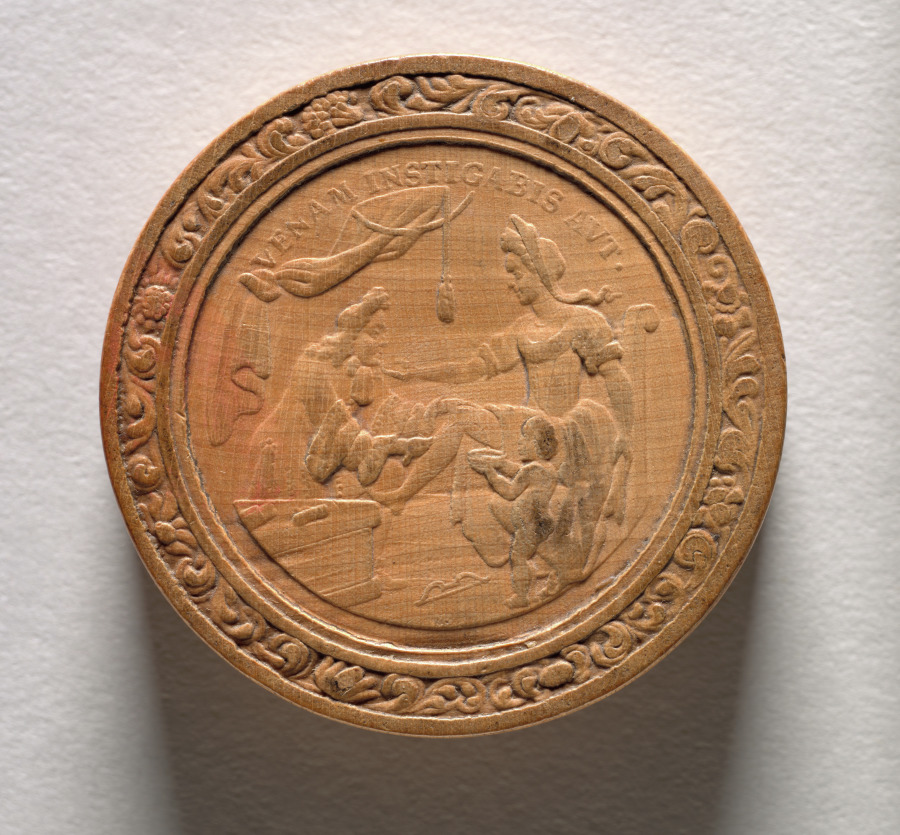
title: Gaming Piece (reverse)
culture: Germany, late 17th-early 18th Century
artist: Martin Brunner (German, 1659–1725)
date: c.1700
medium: wood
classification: Furniture and woodwork